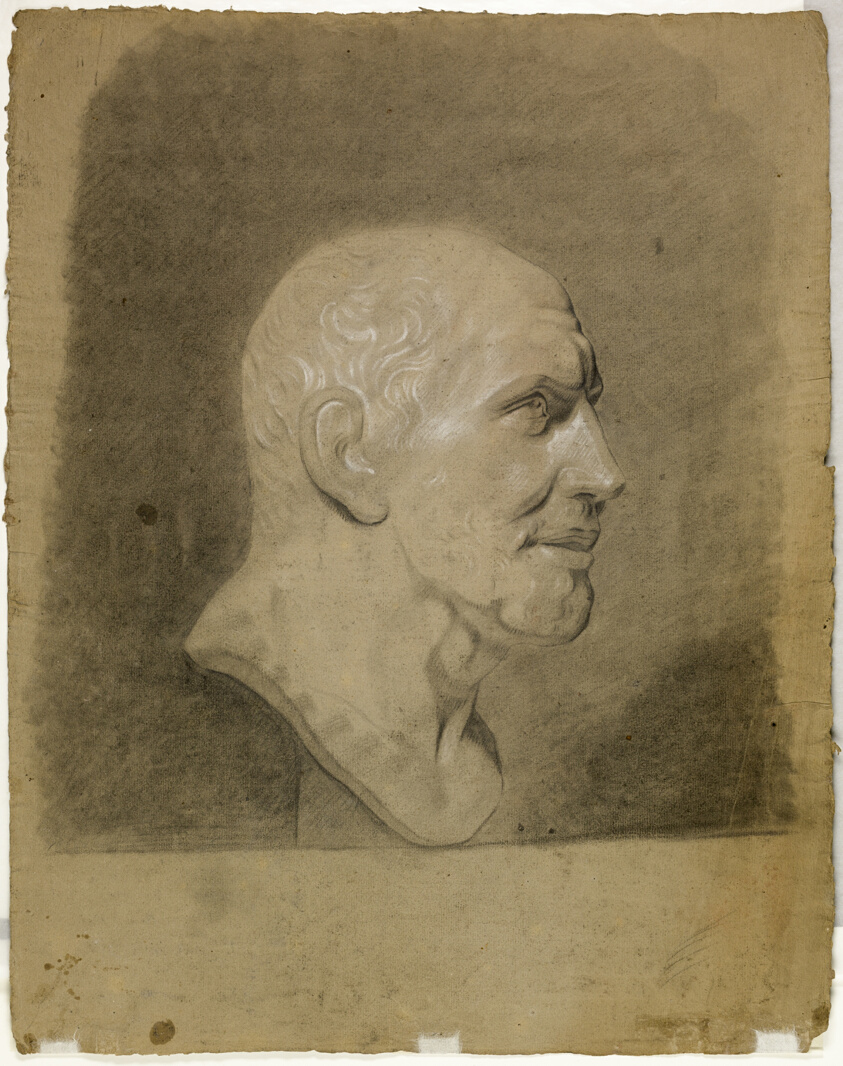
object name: Drawing and Watercolor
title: Standing Male Nude (recto); Classical Head (verso)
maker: Paul Émile Detouche (French, 1794-1874)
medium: Black chalk, with stumping and white heightening (recto), charcoal with white heightening (verso), on buff laid paper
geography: France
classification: charcoal; drawings (visual works); prints and drawing